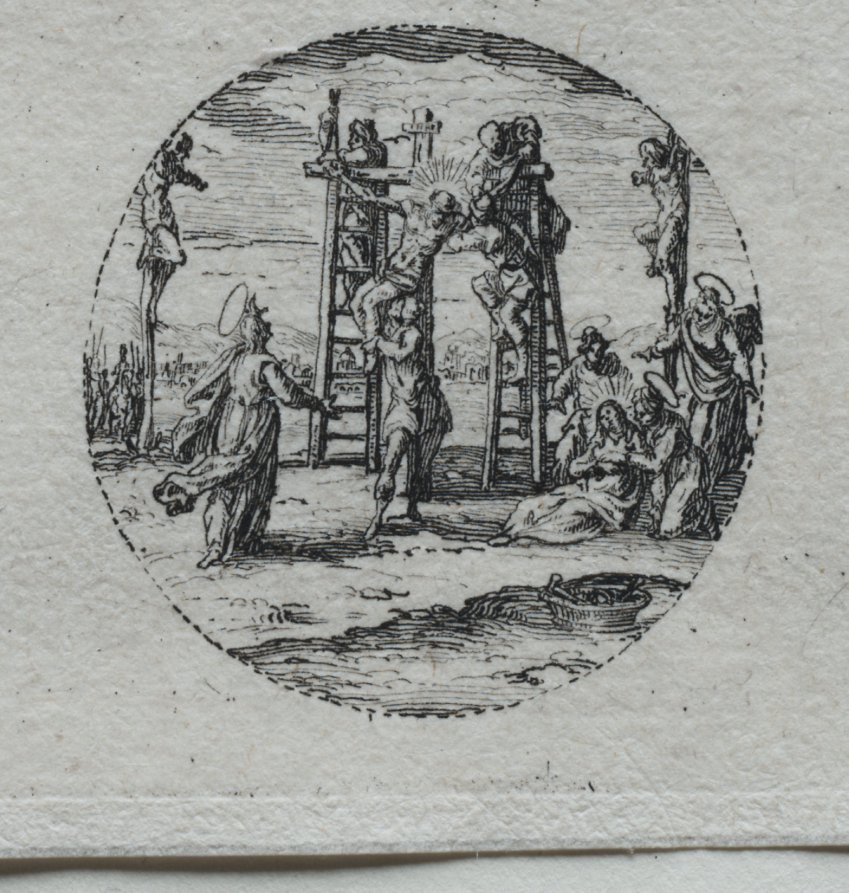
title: The Mysteries of the Passion: The Crucifixion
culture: France, 17th century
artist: Jacques Callot (French, 1592–1635)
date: 1631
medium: etching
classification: Print